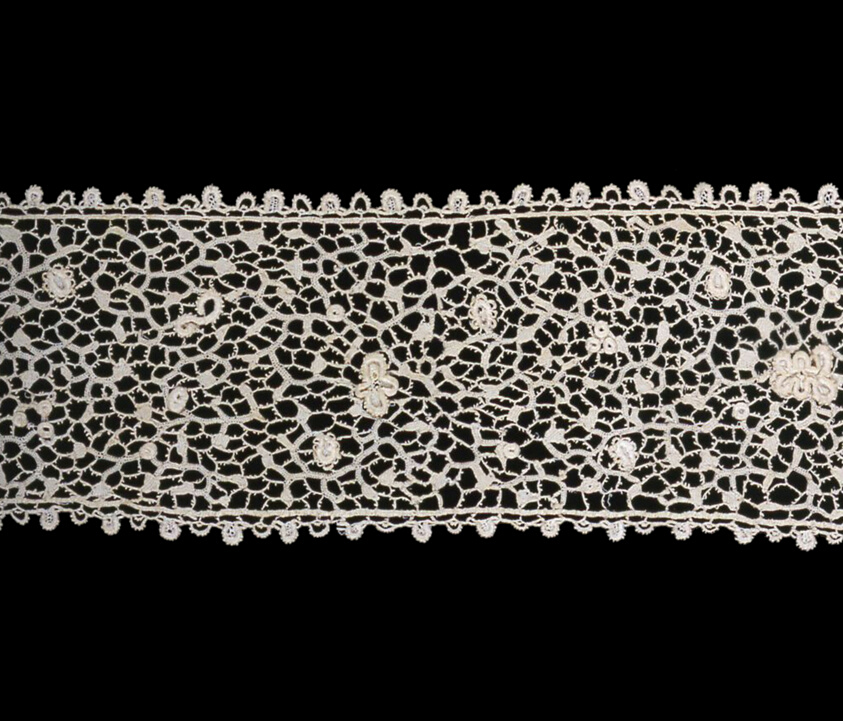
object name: Textile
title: Border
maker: Probably Italy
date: 1875/1900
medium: Linen, needle lace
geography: Italy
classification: textile; lace - needle